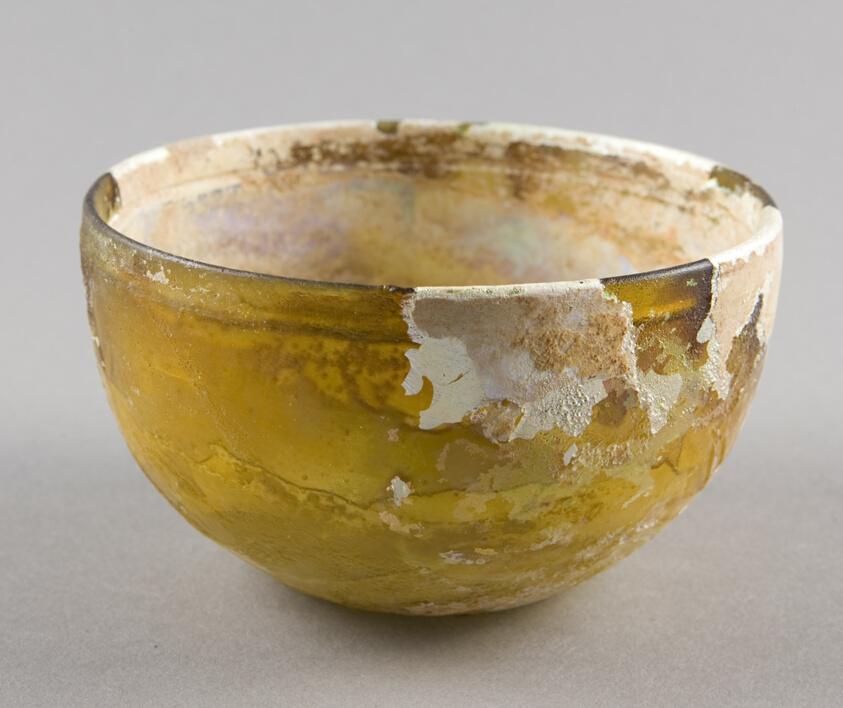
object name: Vessel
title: Bowl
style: syrian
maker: Roman, Levant or Syria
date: 2nd-4th century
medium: Glass, blown technique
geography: Syria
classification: bowl; glass; vessel; ancient art